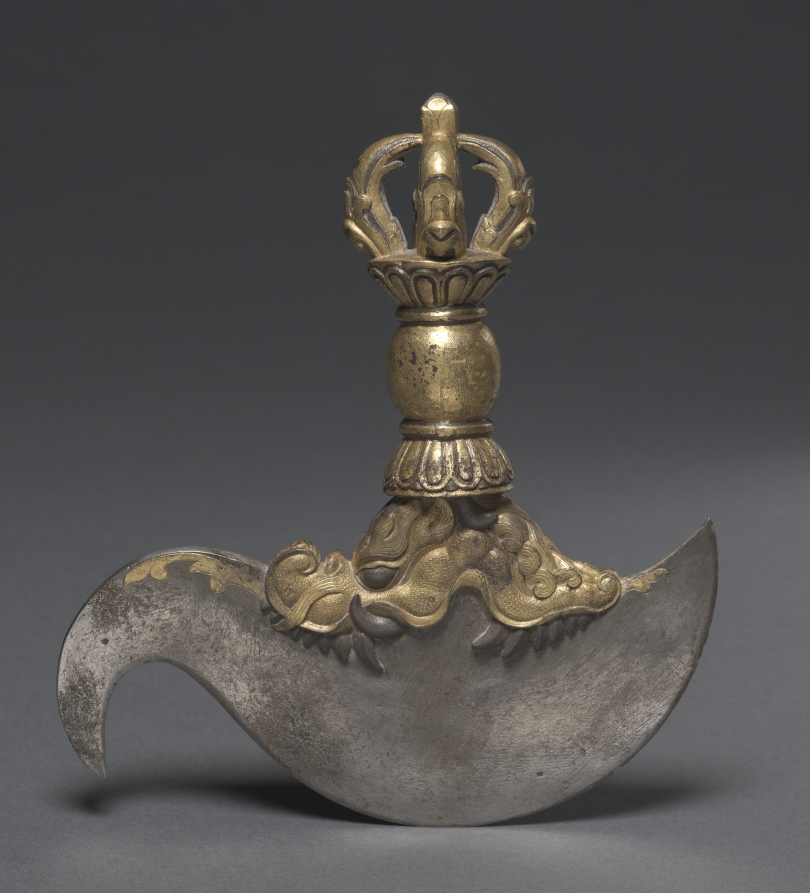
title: Ritual Flaying Knife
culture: Sino-Tibetan, Derge School, Yongle period (1403-1427)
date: c. 1407–1410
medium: iron alloy with gold and silver inlay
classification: Metalwork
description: This ritual object was gifted to a Tibetan patriarch as part of a set of tantric Buddhist art made in the imperial workshop of the Yongle emperor of the Ming dynasty, who reigned from 1403-1425.